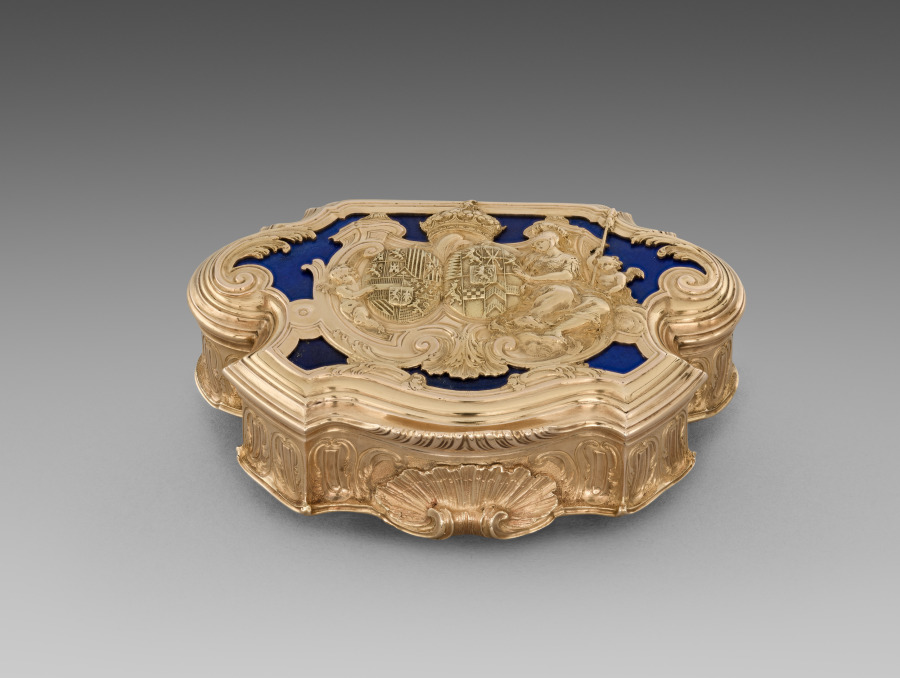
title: Gold Box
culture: France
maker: Juste-Aurèle Meissonnier (French, 1695–1750)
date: 1728–29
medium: gold and lapis lazuli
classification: Metalwork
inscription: IOM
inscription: a crowned M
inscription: a crowned dolphin's head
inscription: a crowned chancellor's mace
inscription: double frame eagle's head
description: With its central cartouche, heavy molding, and fluted sides, the design of this box attests to Juste-Aurèle Meissonnier’s interest in architecture. The box is further distinguished by a strong sense of movement, achieved through its dynamic contour, extraordinary level of detail, and the dramatic contrast between gold and lapis lazuli. Such small boxes, known as snuffboxes, were used to hold scented powdered tobacco that was inhaled through the nostrils. Made of precious materials and highly ornamented, they conveyed the owner’s wealth, fashion awareness, sophistication, and social standing. These personal, collectible items were often presented as luxurious gifts. This box was made for the dowager Queen of Spain, Maria Anna of Neuburg, whose coat of arms – along with that of her late husband, Charles II – features on the cover.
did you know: This is one of the two known objects that bear the maker's mark of Meissonnier.